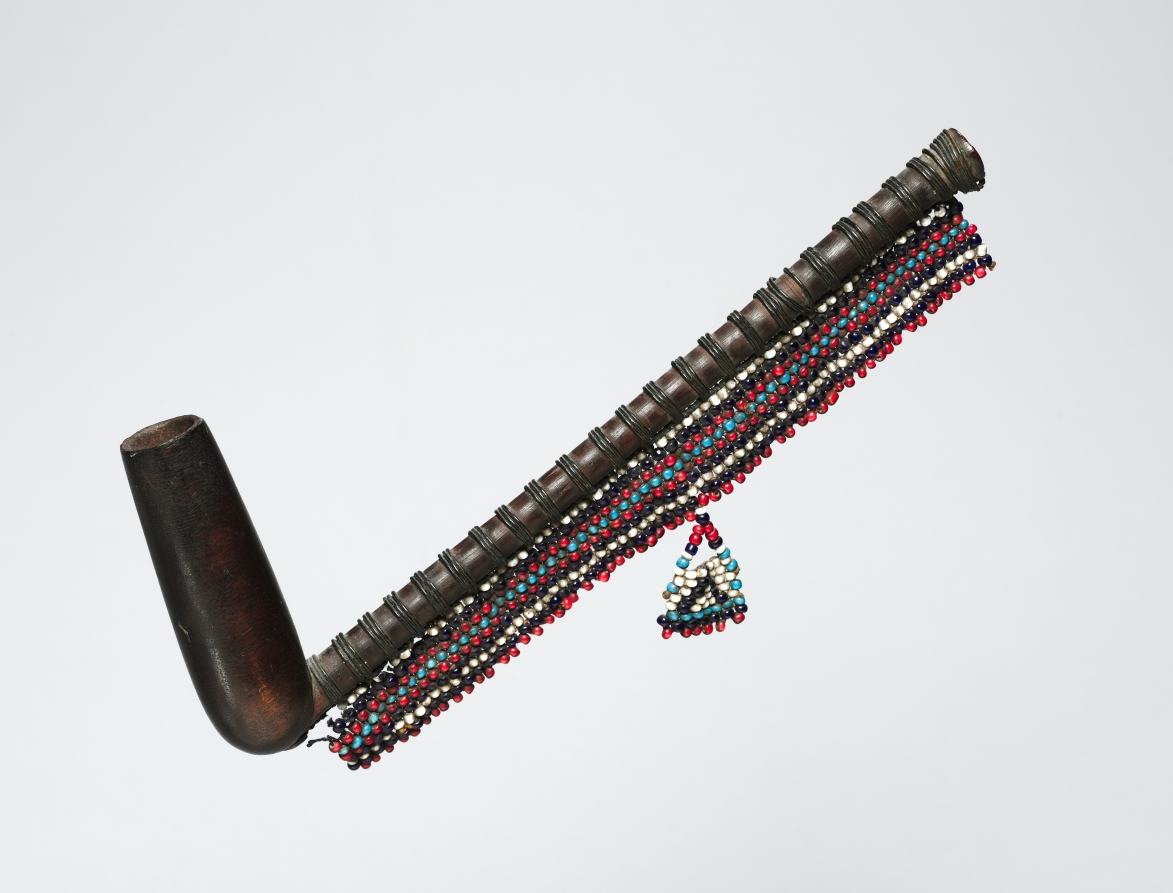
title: Pipe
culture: Africa, Southern Africa, South Africa, Xhosa-style maker(s)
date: 1800s–1900s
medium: Wood, copper, glass beads, sinew, leather, and thread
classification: Implements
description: Mothers often used long-stemmed pipes like this because they helped direct smoke away from the babies they carried on their backs. Carved by men, pipes were used by both men and women. A female maker added beaded fringe using a color scheme typical of Xhosa beadwork. The miniature apron suspended from the fringe suggests a woman’s garment, and thus ownership of this pipe. Social and leisure practices, smoking and snuffing tobacco were also associated with the ancestors and with ideas of fertility and procreation. Inherited between individuals and families, pipes have connected clans and generations and thus linked the worldly present with the ancestral past.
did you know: The basic form of pipes like this one derives from examples made from clay, which the Dutch introduced at the end of the 1500s.